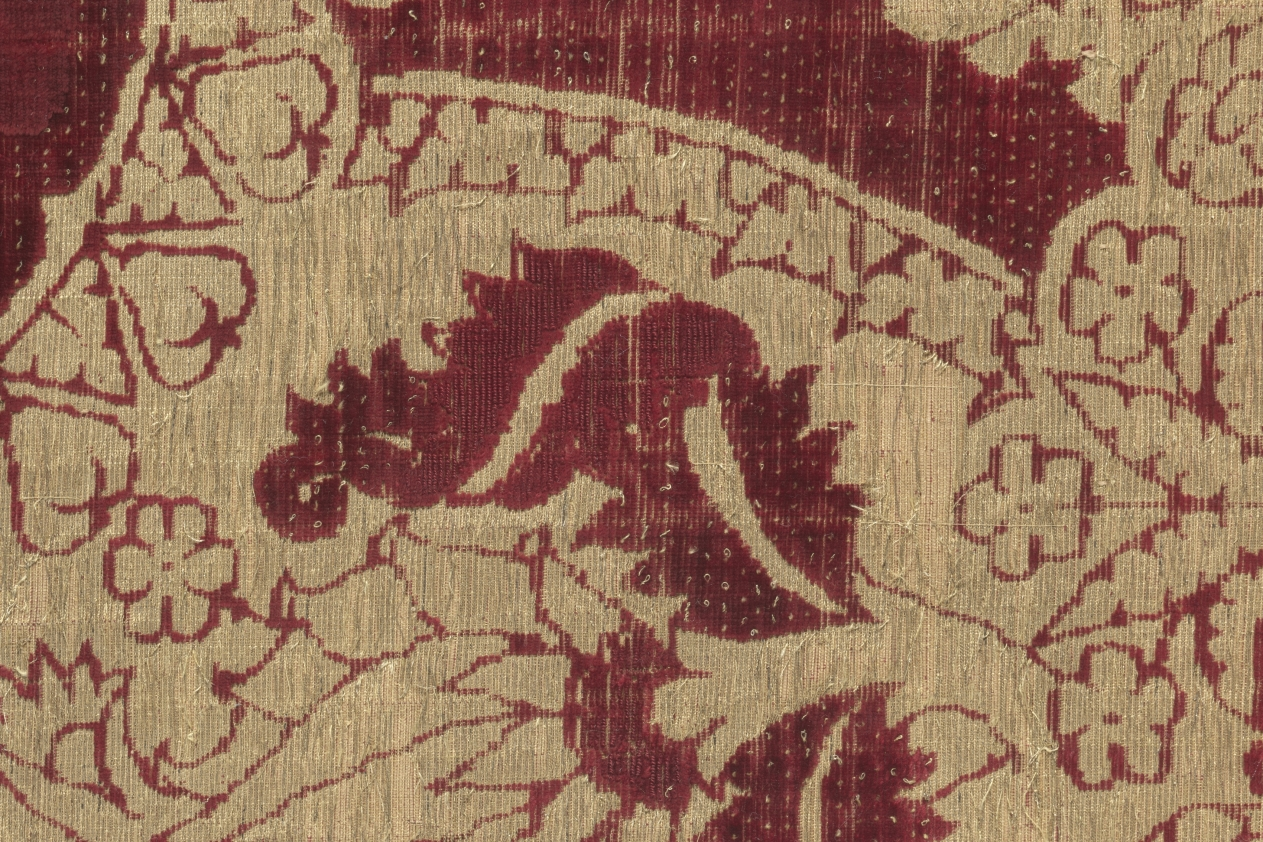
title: Silk Velvet with Gold in Pomegranate Pattern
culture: Italy, possibly Florence, 15th century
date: 1450–1500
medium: silk, gold thread; velvet: cut pile in two heights, uncut pile loops, gold-thread loops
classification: Velvet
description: Luxurious silk velvets with expensive gold thread were symbols of wealth and power. The finest velvets during the 1400s have two, or even three, heights of lush projecting pile. This fashionably large pomegranate pattern features exorbitant gold-thread loops enriching the lower level and a plain higher level. The curved upper and lower contours suggest this was the back of a sleeveless ecclesiastical vestment known as a chasuble. The striped green and ivory selvage was the equivalent of a label, required by law. It identified the fiber content, its quality, and quantity, which determined the price. Selling prices reflected the costs of the raw materials—gold thread, silk, and dyestuffs. Compensation for artisans was generally minimal.